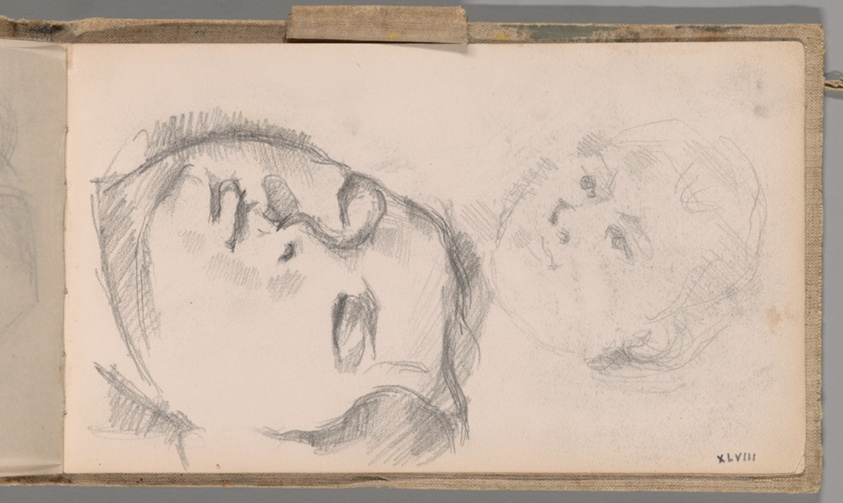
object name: Drawing and Watercolor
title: Sketchbook No. 2 (L'Estaque)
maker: Paul Cézanne; French, 1839-1906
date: 1875–86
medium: Graphite and pen and ink drawings on paper, bound into a book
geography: France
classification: sketchbook; graphite; prints and drawing; paper